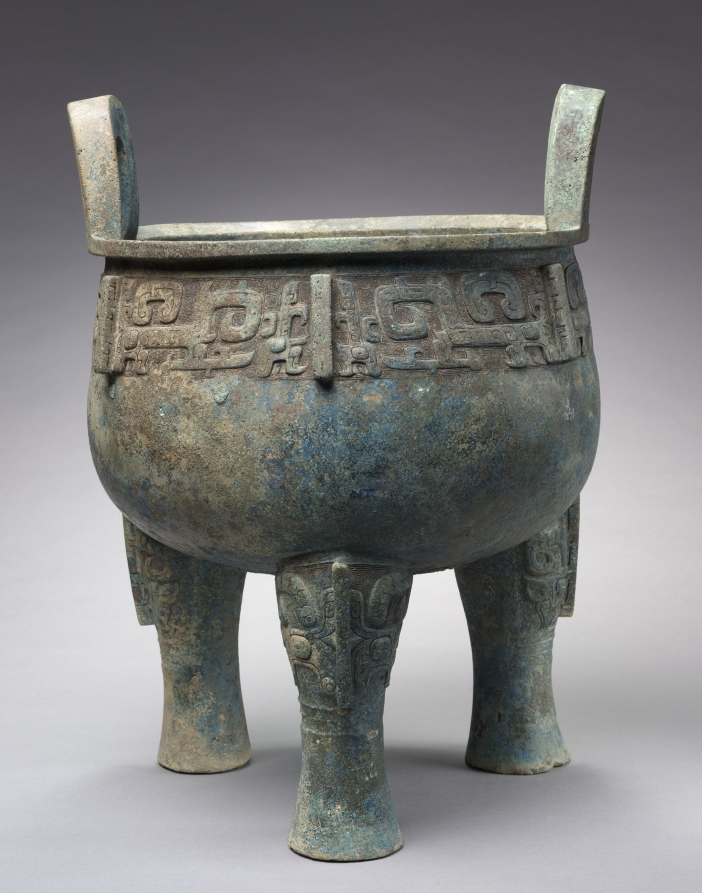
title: Tripod (Ding)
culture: China, Western Zhou dynasty (c. 1046–771 BCE)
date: 1000s BCE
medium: bronze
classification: Metalwork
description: Large and majestic, this tripod gives the effect of overpowering force. Three animal masks (known as taotie) with coiled creatures are aligned in the decorative frieze. With the gaze of the staring eyes, the animal masks assert a religious presence and are meant to instill fear. Bold images of the ram embellish the three legs of the vessel. Bronze cauldrons (ding) like this were made for offerings of food to ancestral spirits in sacrificial and funerary rites performed by the rulers or members of the aristocracy. The ding, in particular, assumed additional significance as the symbol of political power and legitimacy. As signs of status in a stratified society, such highly valued bronzes were cast by its makers with the wish to be "forever treasured for ten thousand years, by sons' sons and grandsons' grandsons."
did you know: Bronze tripods of the ding-type were vessels made in sets of different sizes to be used in rituals, in which grain and meat was offered to the spirits of the ancestors.